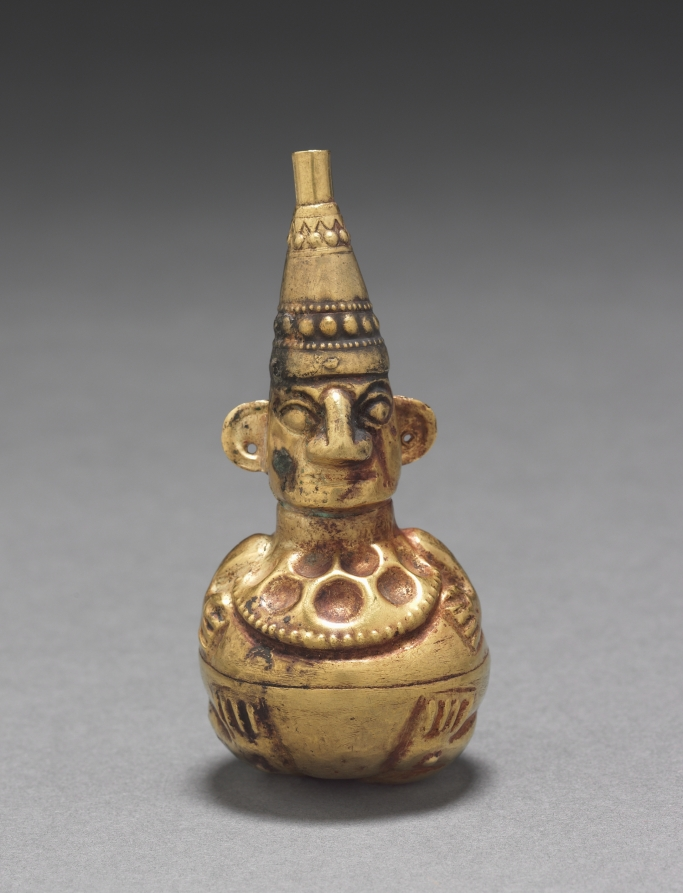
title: Figural Flask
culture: Peru, North Coast, Lambayeque Valley, Sicán or Chimú, 9th-15th Century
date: c. 800–1470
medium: hammered and embossed gold alloy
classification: Metalwork